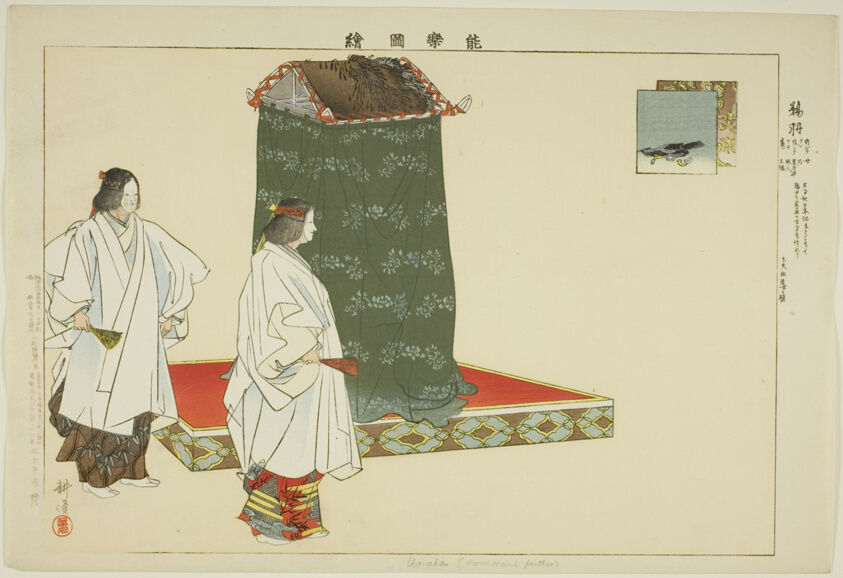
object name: Print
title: Unoha, from the series "Pictures of No Performances (Nogaku Zue)"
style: Japanese (culture or style)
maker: Tsukioka Kogyo; Japanese, 1869-1927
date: 1898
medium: Color woodblock print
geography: Japan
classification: woodblock print; print; asian art